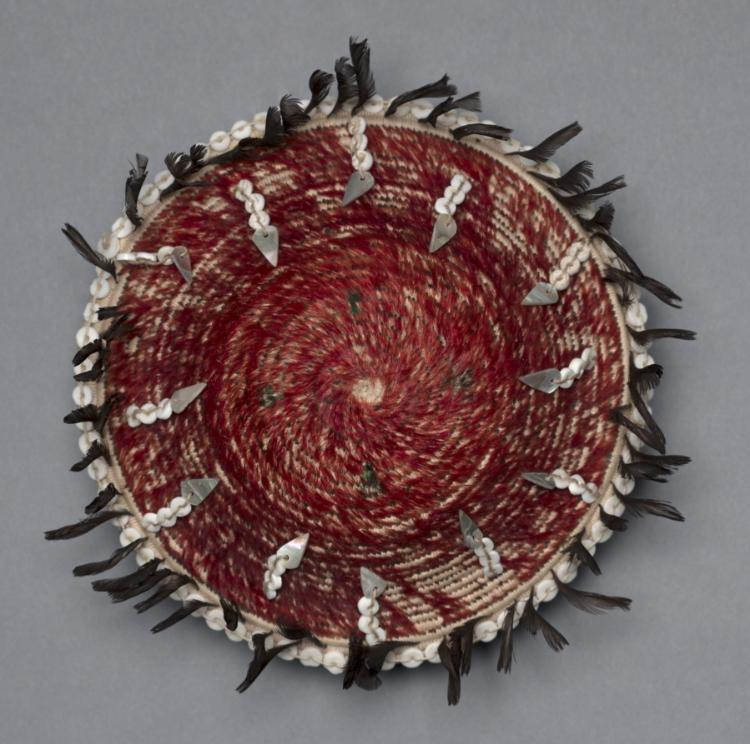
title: Gift Bowl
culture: California, Pomo, 20th century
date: c. 1900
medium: Sedge with mallard, quail, acorn woodpecker feathers, clam and abalone shells; coiled (3 rods)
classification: Basketry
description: Although this basket probably was not made for native use, the feathered basket is based on an older type that was exchanged among natives as a treasured gift on such occasions as ceremonies that marked the stages of life. The feathers and shell beads are symbols of prestige and wealth.